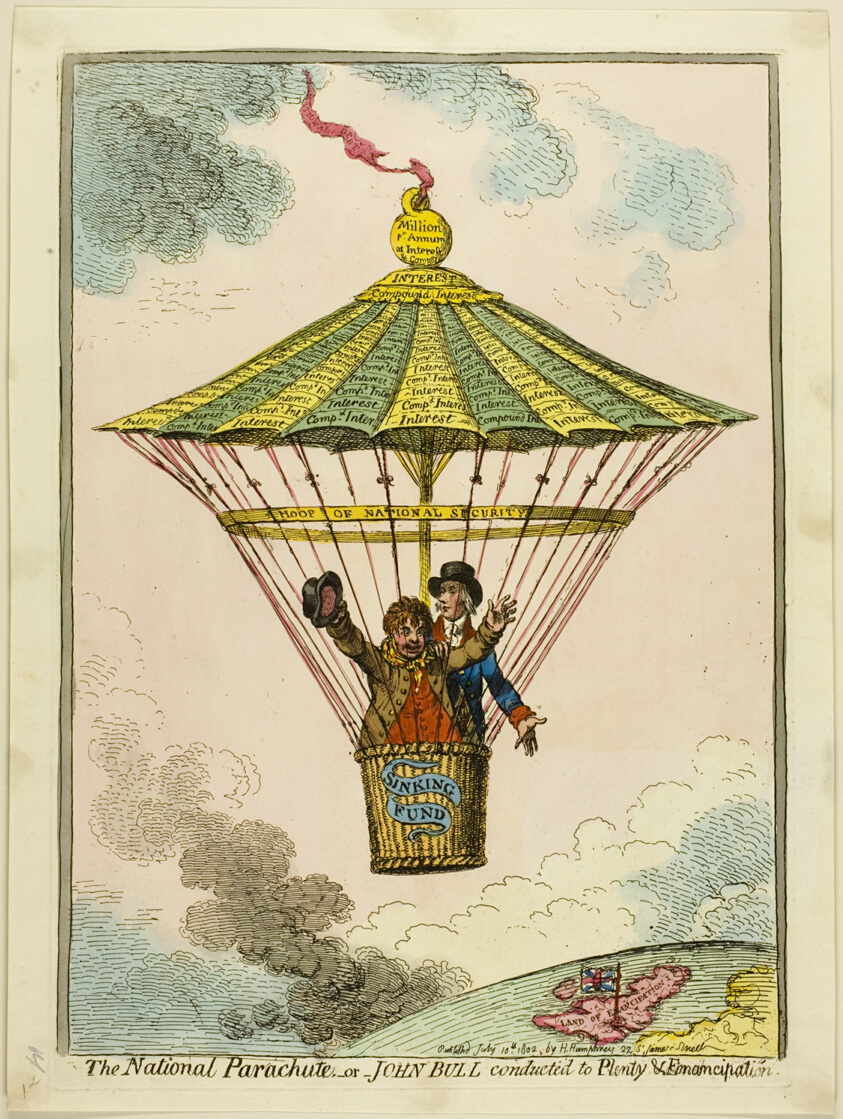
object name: Print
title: The National Parachute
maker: James Gillray (English, 1756-1815); published by Hannah Humphrey (English, c. 1745-1818)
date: published July 10, 1802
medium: Hand-colored etching on paper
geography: England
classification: etching; print; prints and drawing